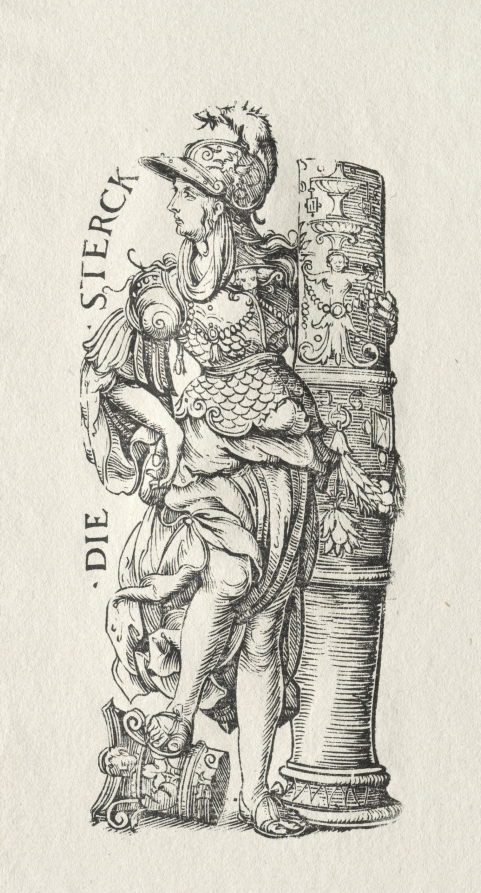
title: The Seven Virtues: Courage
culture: Germany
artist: Hans Burgkmair (German, 1473–1531)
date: 1510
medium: woodcut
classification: Print